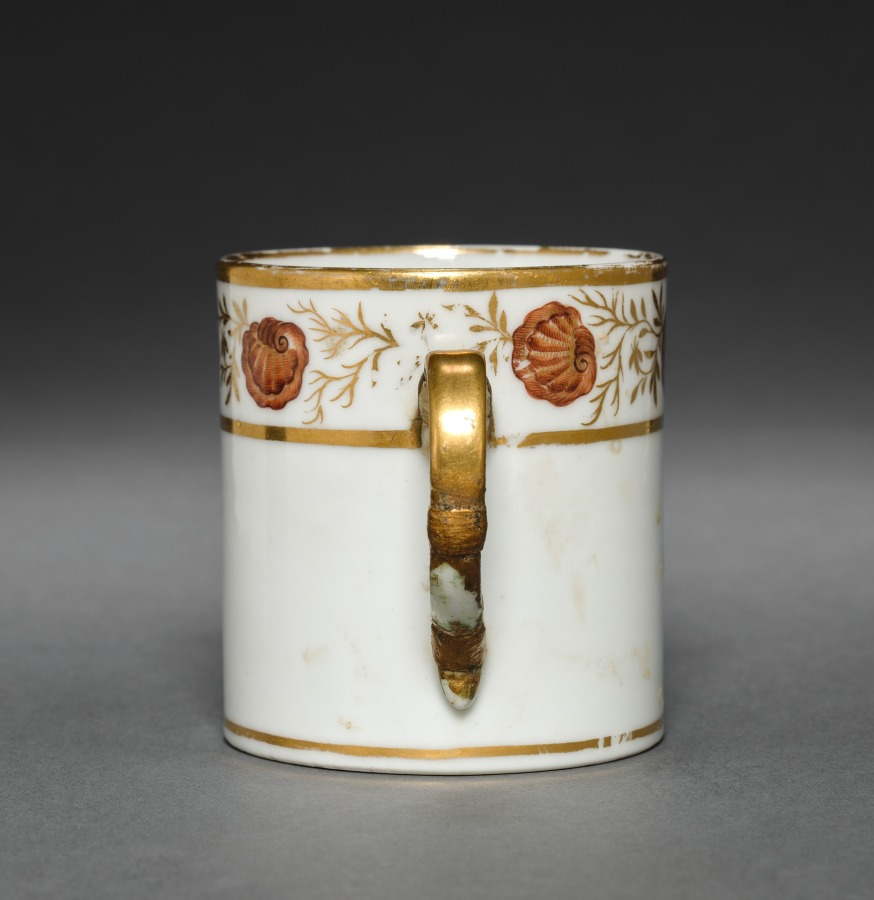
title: Cup from Oliver Wolcott, Jr. Tea Service (6 of 6)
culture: Chinese Export porcelain, late 18th-early 19th century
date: 1785–1805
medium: porcelain, sepia enamel, gold leaf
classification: Ceramic